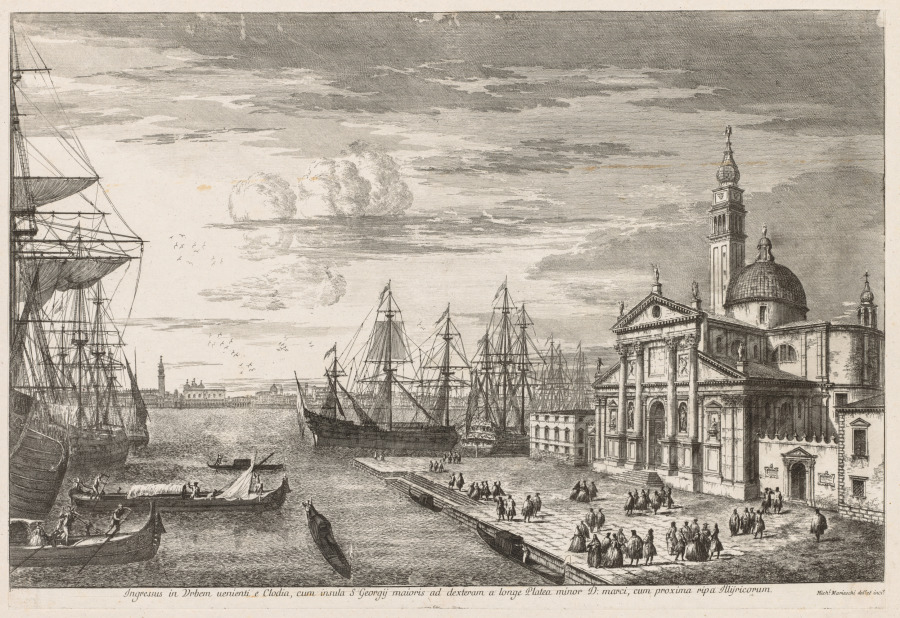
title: Views of Venice: The Basin of St. Mark's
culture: Italy, 18th century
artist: Michele Marieschi (Italian, 1710–1743)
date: 1741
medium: etching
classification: Print